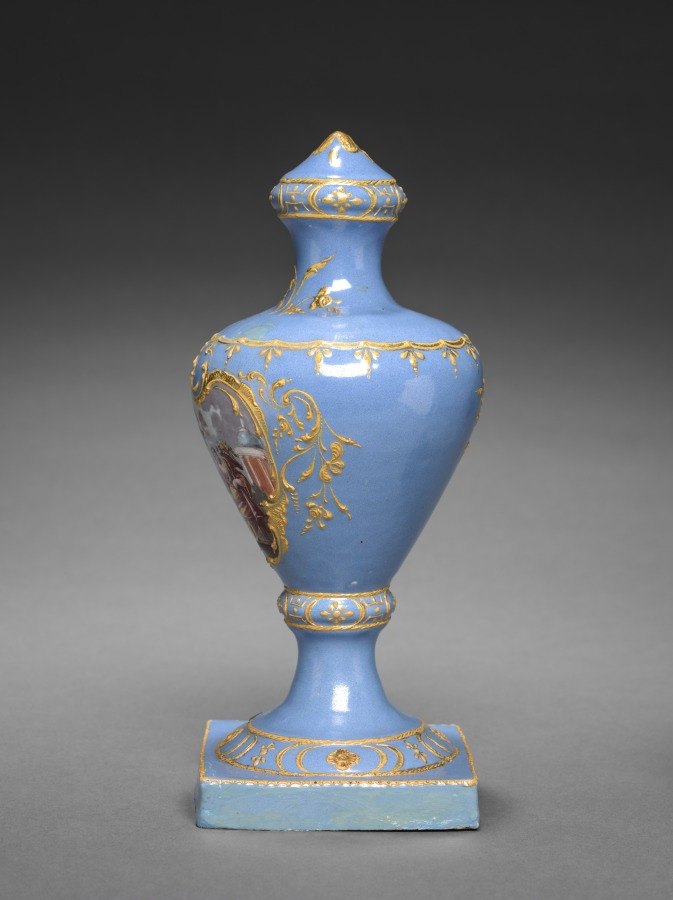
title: Urn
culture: England, South Staffordshire, 18th century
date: c. 1770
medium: enamel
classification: Enamel